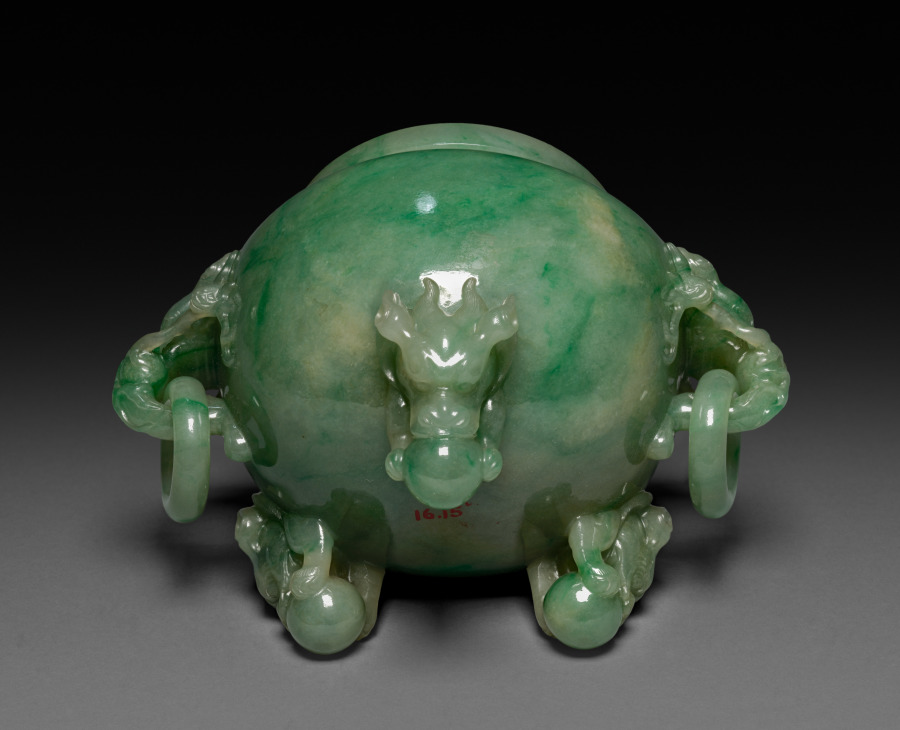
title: Tripod Vase: Ting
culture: China, Qing dynasty (1644-1911)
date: 1644–1911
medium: jade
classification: Jade